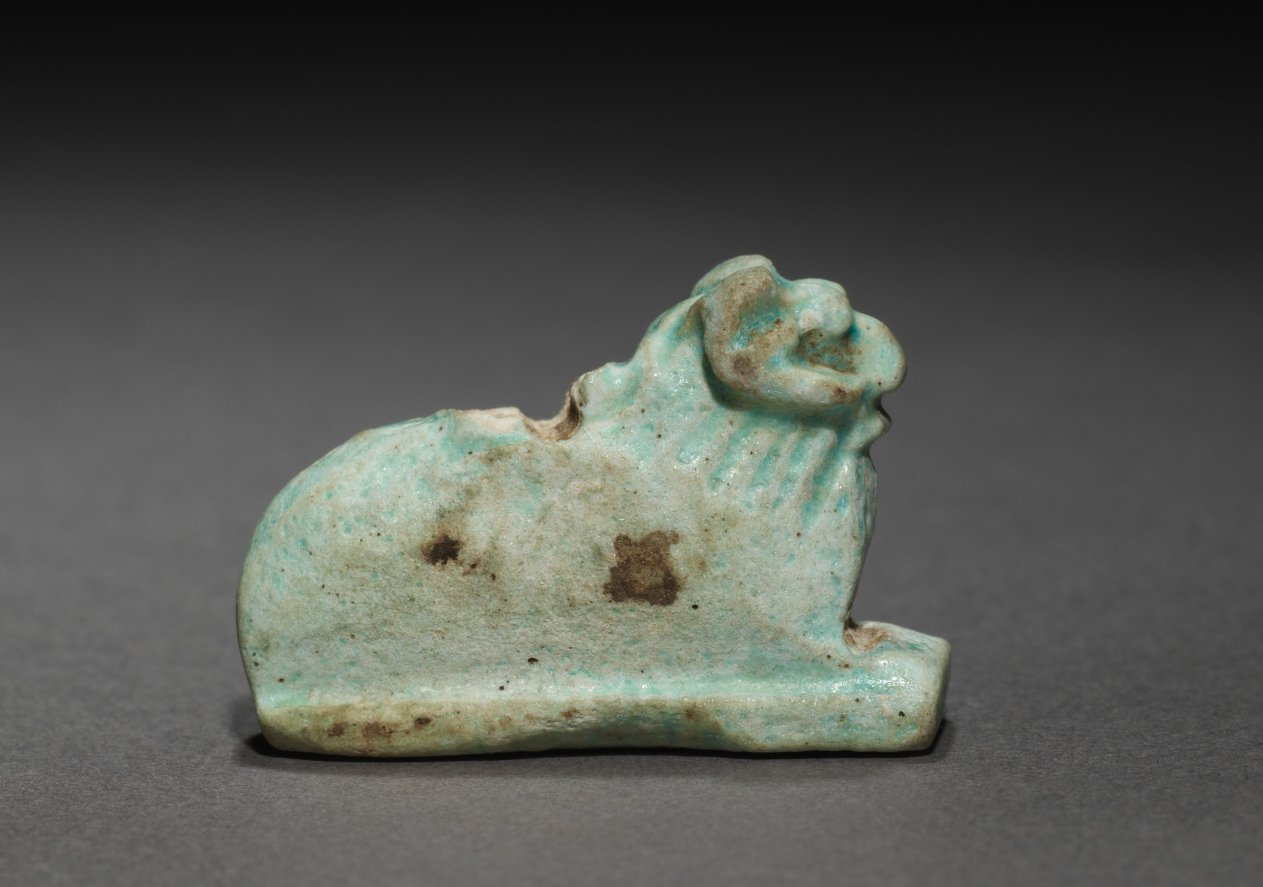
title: Ram Amulet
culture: Egypt, Greco-Roman period (332 BCE–395 CE), Ptolemaic dynasty (305–30 BCE)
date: 305–30 BCE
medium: light robin's egg blue faience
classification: Amulets